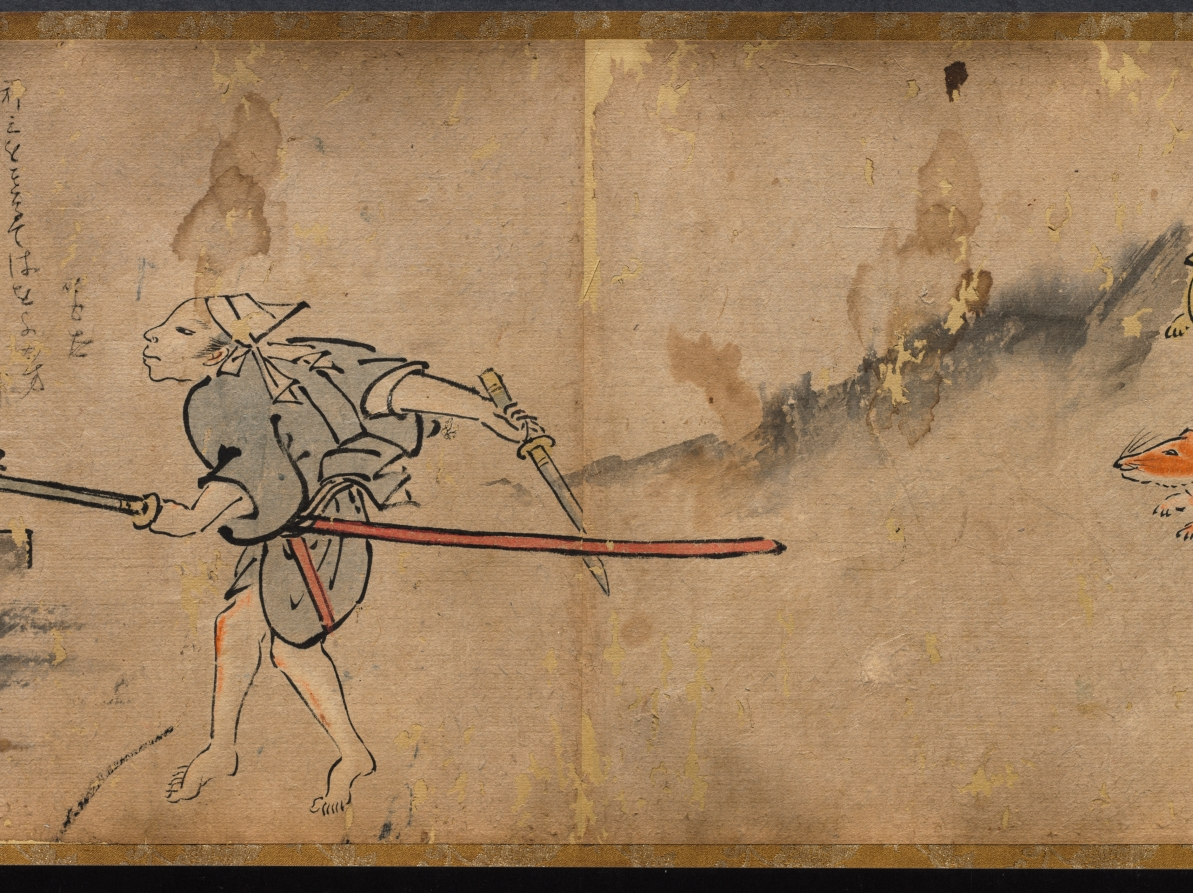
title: The Illustrated Tale of Oishi Hyōroku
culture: Japan, Edo period (1615–1868)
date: 1700s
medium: handscroll; ink and color on paper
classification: Painting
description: This incomplete handscroll illustrates part of the story of Oishi Hyoroku, a young man tasked with battling fox apparitions who were creating problems in his town. In other extant versions of the scroll, the story is set in the fall of 1624 in Kagoshima in southern Japan. Throughout the story, Hyoroku is tricked and terrified by the foxes that shift their shapes into a variety of monstrous phantoms. After repeated humiliations, he eventually captures two of the foxes. In this version, colloquial texts that function like text blurbs in comics appear throughout the scroll, but the main text is missing.